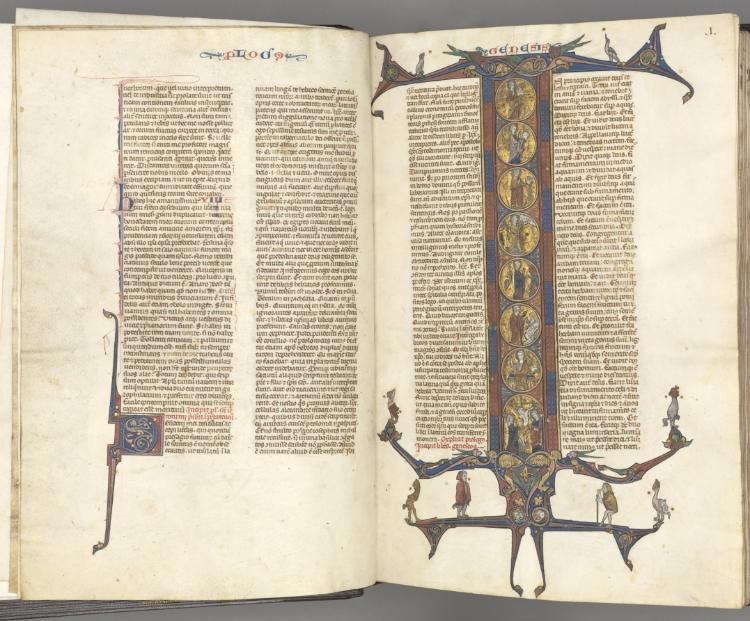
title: Fol. iii v, Foliated Initial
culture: Southern France, Toulouse(?), 13th century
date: c. 1275–1300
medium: ink, tempera and gold on vellum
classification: Bound Volume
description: Biblical manuscripts were highly prized and important possessions of churches, monasteries, cathedral schools, and universities throughout medieval Europe. The biblical texts were known as the vulgate, the translations made by Saint Jerome in the fourth century from Hebrew and Greek into Latin, which became the definitive and official Latin version of the Roman Church. In the 13th century, the bible was, for the first time, produced as a single volume with an officially sanctioned sequence to its books and chapters as illustrated by this example. The very extensive decoration of this bible is arranged hierarchically to indicate the relative importance of the various texts so that full or almost full-page initials mark the openings of the first prologue, Genesis, and the first Gospel; historiated initials mark the beginning of each book and illuminated initials mark the Prologues.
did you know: Original texts of the Old and New Testaments were written in Greek and Hebrew.